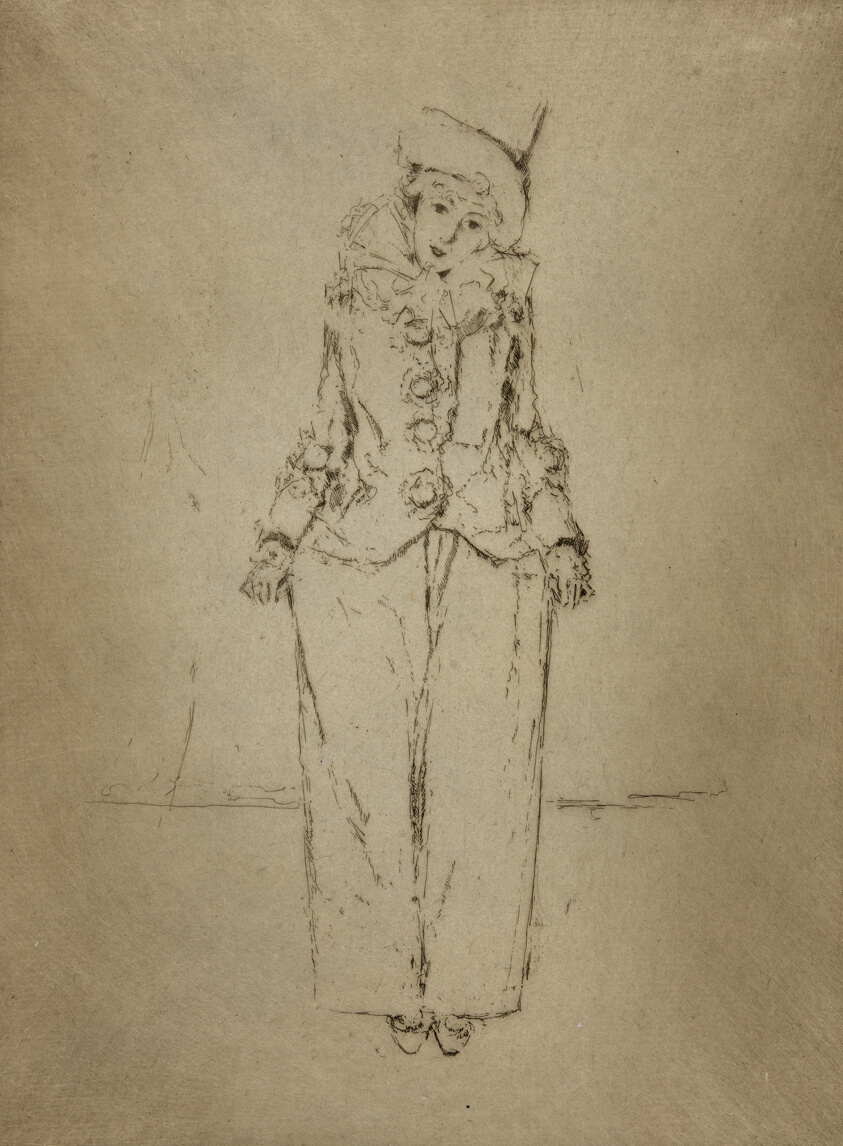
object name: Print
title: Pierrot en Pied, Portrait of the Lady A. C.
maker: Theodore Roussel (French, worked in England, 1847-1926)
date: 1888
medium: Etching in brown with plate tone on cream laid paper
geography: England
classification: etching; paper; print; prints and drawing